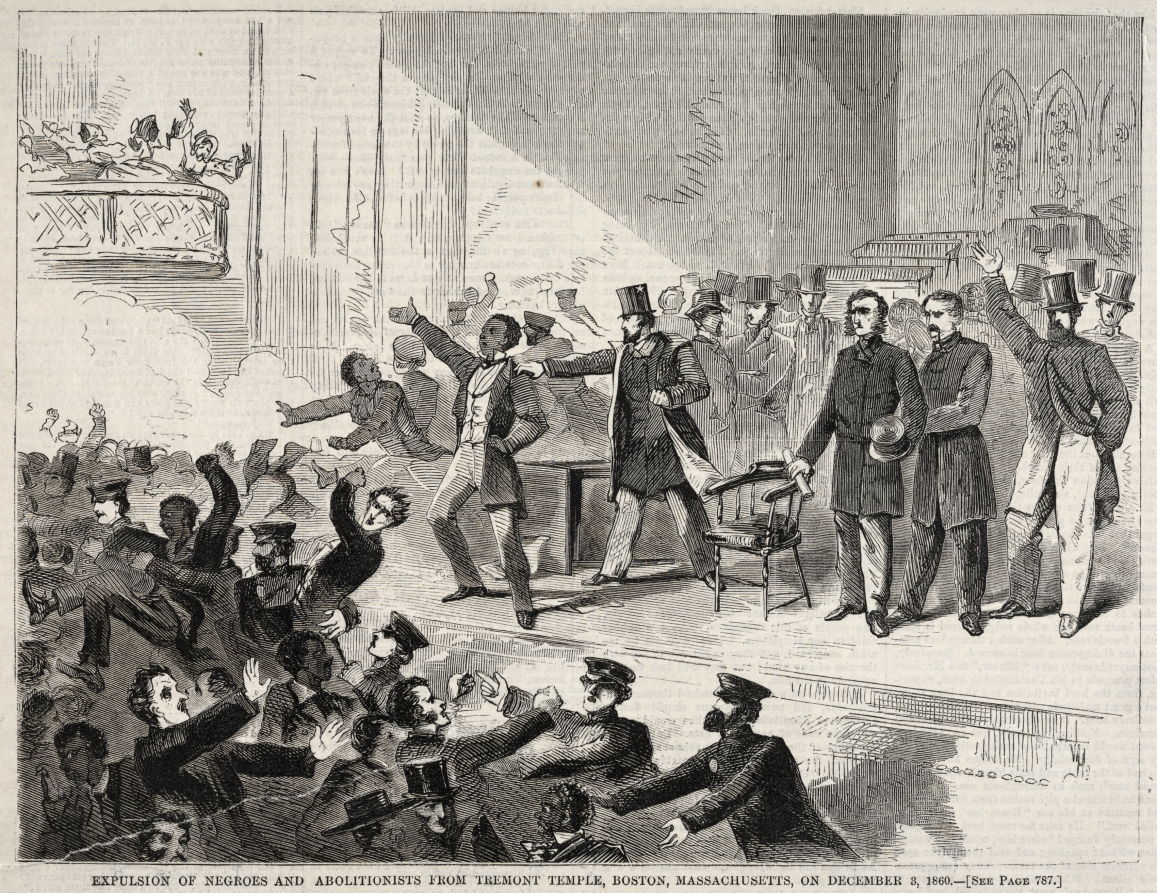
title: Expulsion of Negroes and Abolitionists from Tremont Temple, Boston, Massachusetts, on December 3, 1860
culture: America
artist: Winslow Homer (American, 1836–1910)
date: 1860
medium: wood engraving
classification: Print